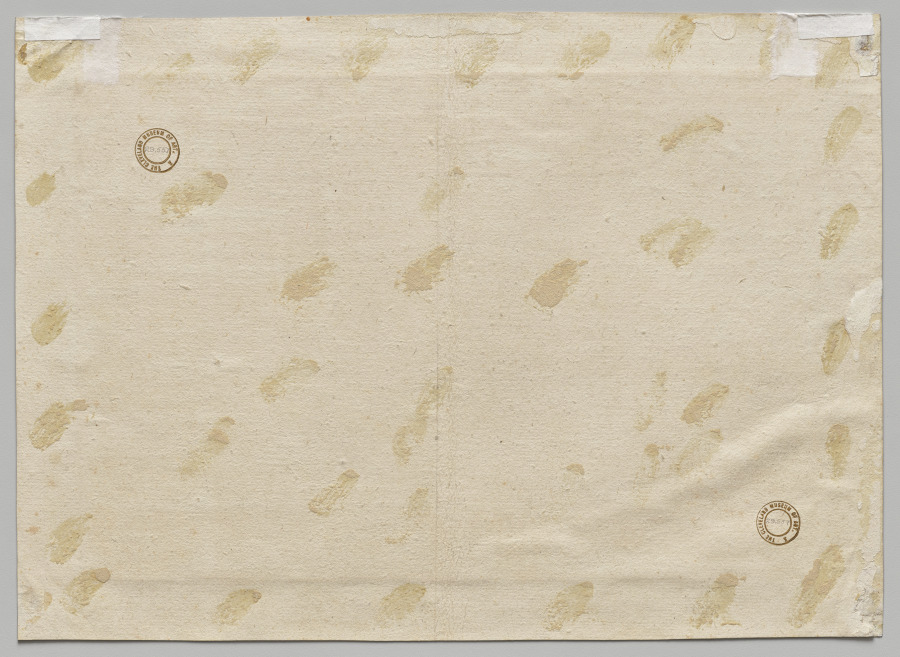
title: Saint Jerome in a Landscape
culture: Italy, 16th century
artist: Domenico Campagnola (Italian, 1500–1564)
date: c. 1530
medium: pen and brown ink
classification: Drawing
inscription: RECTO OF MOUNT, lower left, in graphite: 61 [6 crossed out, 1 underlined] / 236 [underlined] ; lower center, in graphite: Titian [inscribed in a cartouche] ; lower center, in graphite: 3 ; lower right, in graphite: 8930 [erased] ; lower right, in graphite: [illegible]/q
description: Domenico Campagnola helped to establish a specialized collector’s market for landscape drawings, building upon the legacy of his father, Giulio Campagnola, and Titian. Like Titian, Domenico’s works emphasize God’s power as expressed through the natural world. Hermit Saint Jerome, at lower left, sits in spiritual contemplation within a dynamic landscape rendered with Domenico’s distinctive linear style, complete with rustic houses, humble tree groves, and grand distant vistas. Independent drawings (drawings made as works of art in and of themselves) were a new category of drawing advanced by Domenico and others.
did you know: Domenico Campagnola was one of the first artists in Renaissance Italy to create drawings such as this as ends in themselves rather than as preparatory studies.